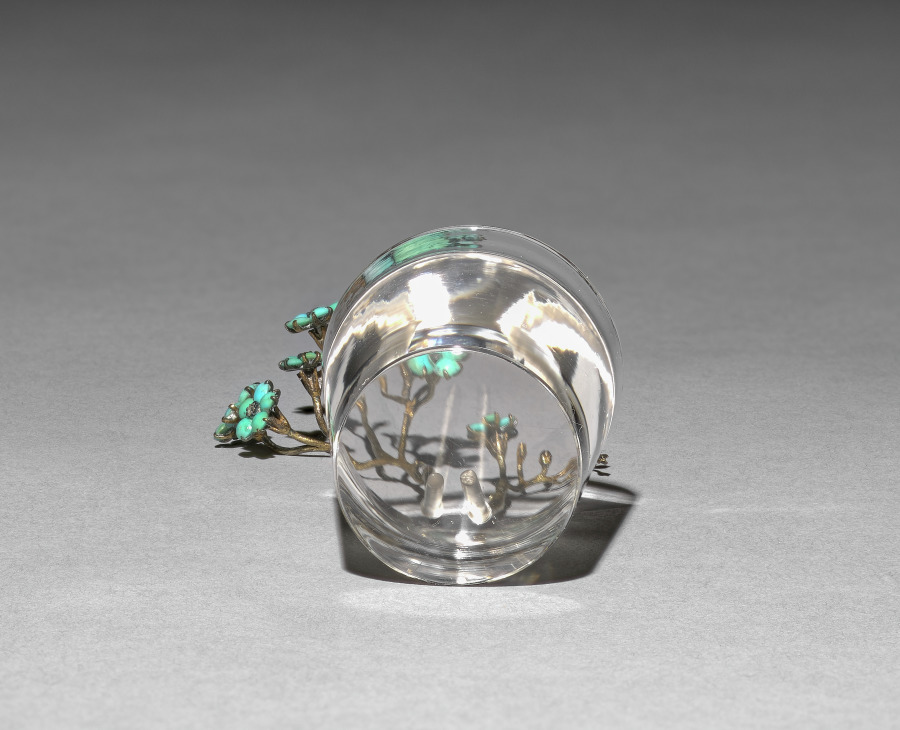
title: Flower Study of Forget-Me-Nots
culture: Russia, St. Petersburg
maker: House of Fabergé (Russian, 1842–1918)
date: c. 1885–1915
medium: turquoise, diamonds, rock crystal, silver gilt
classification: Miscellaneous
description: These delicate flowers, resembling a bouquet of forget-me-nots, are composed of finely rounded turquoise stones set around rose-cut diamonds on silver-gilt stems placed in rock crystal pots. Fabergé’s inspiration for his flower studies is said to have come from the floral brooches of precious stones that were made in the 1700s for Catherine the Great as well as from the Japanese art of flower arranging, known as ikebana. Fabergé’s flower studies were given as intimate gifts to friends by the tsarina and others in the court. She also liked to take them around to wherever the imperial family was residing as a reminder of spring during the harsh Russian winters.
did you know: The stems of Fabergé’s flower studies are set into little basins carved from rock crystal to resemble pots of water.